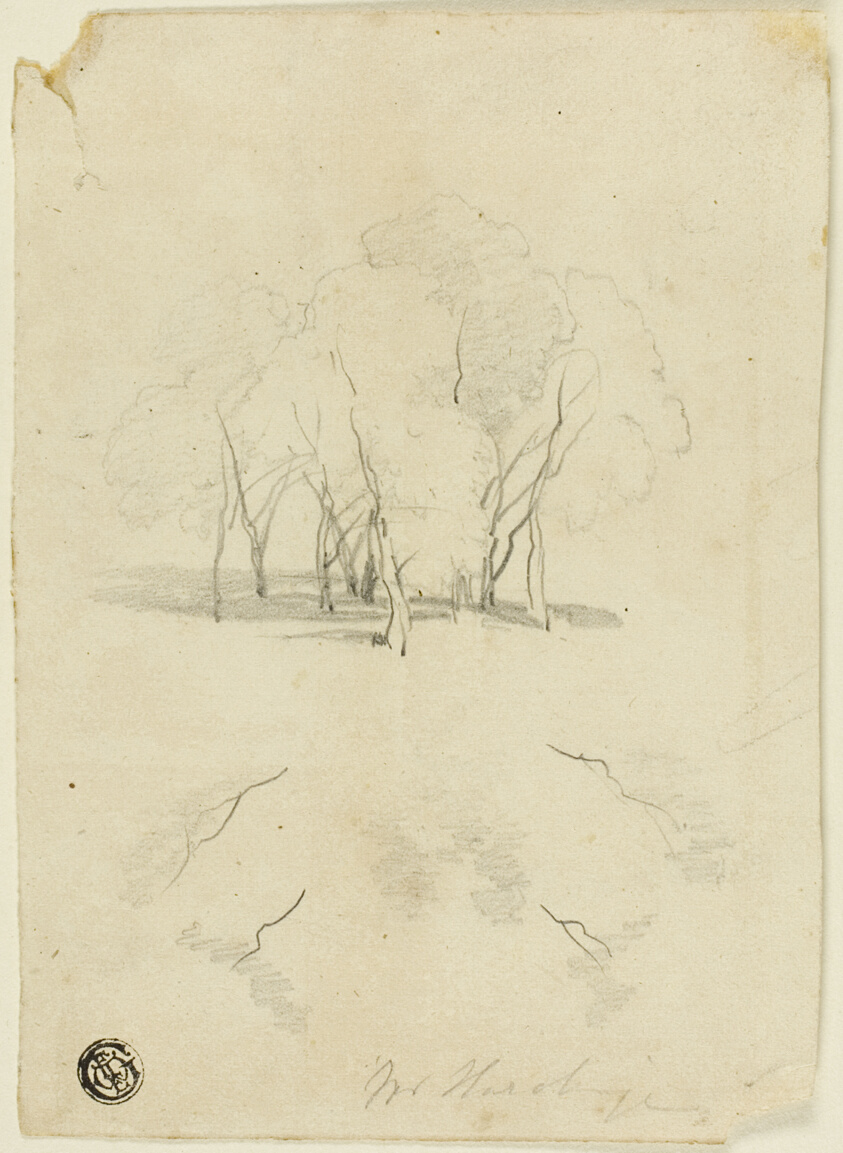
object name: Drawing and Watercolor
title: Clump of Trees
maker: Attributed to James Duffield Harding; English, 1798-1863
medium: Graphite on buff wove paper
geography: England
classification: graphite; drawings (visual works); prints and drawing